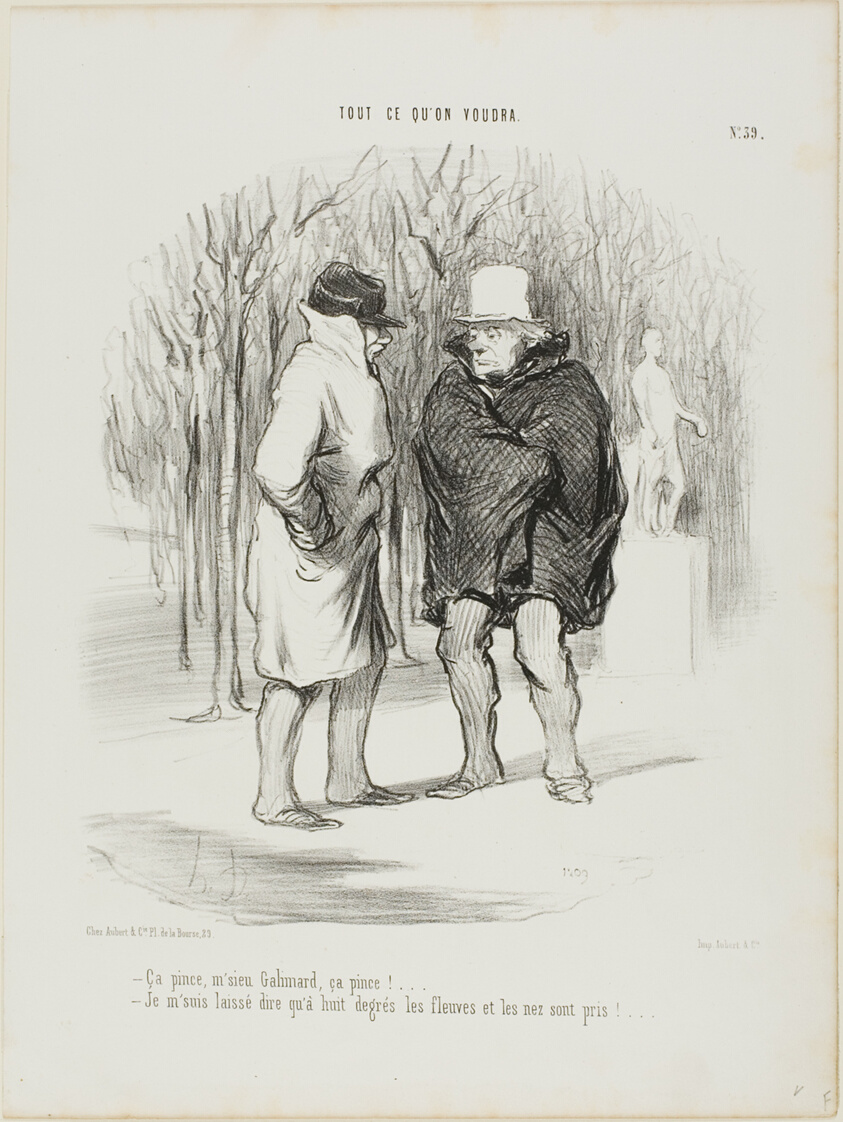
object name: Print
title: “- It's nippy, Mr. Galimard, it's nippy!... - Allow me to say that at 8 degrees the rivers and the noses are frozen...,” plate 39 from Tout Ce Qu'on Voudra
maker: Honoré Victorin Daumier; French, 1808-1879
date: 1848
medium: Lithograph in black on white wove paper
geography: France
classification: lithograph; print; prints and drawing